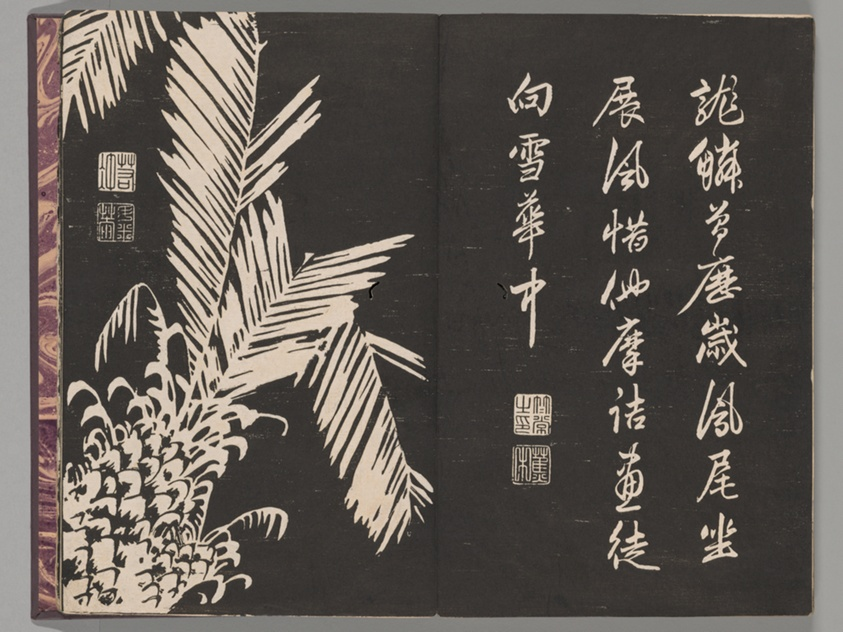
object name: Book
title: Soken sekisatsu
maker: Ito Jakuchu (Japanese, 1716-1800)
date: 1767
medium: Woodblock printed book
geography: Japan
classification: book